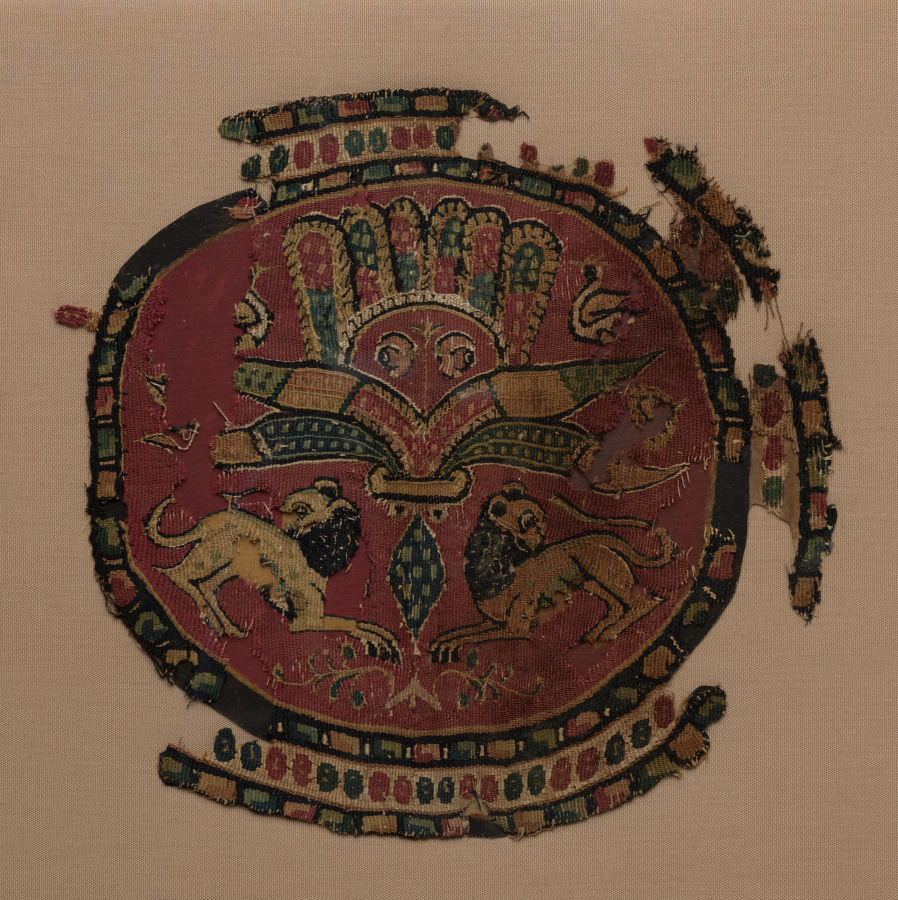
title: Lions from a Tunic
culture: Egypt, Islamic Abbasid period, 8th - 9th Century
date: c. 800's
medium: tapestry weave with supplementary weft wrapping; undyed linen and dyed wool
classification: Textile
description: The royal lions and jeweled border in this colorful roundel, originally from a tunic, conveyed power and wealth. The symmetrical design with lions and ducks flanking the central palmette (fan-shaped plant form) indicates that the pattern was copied from a costlier silk textile woven on a loom that automatically repeated the design in mirror-image symmetry.